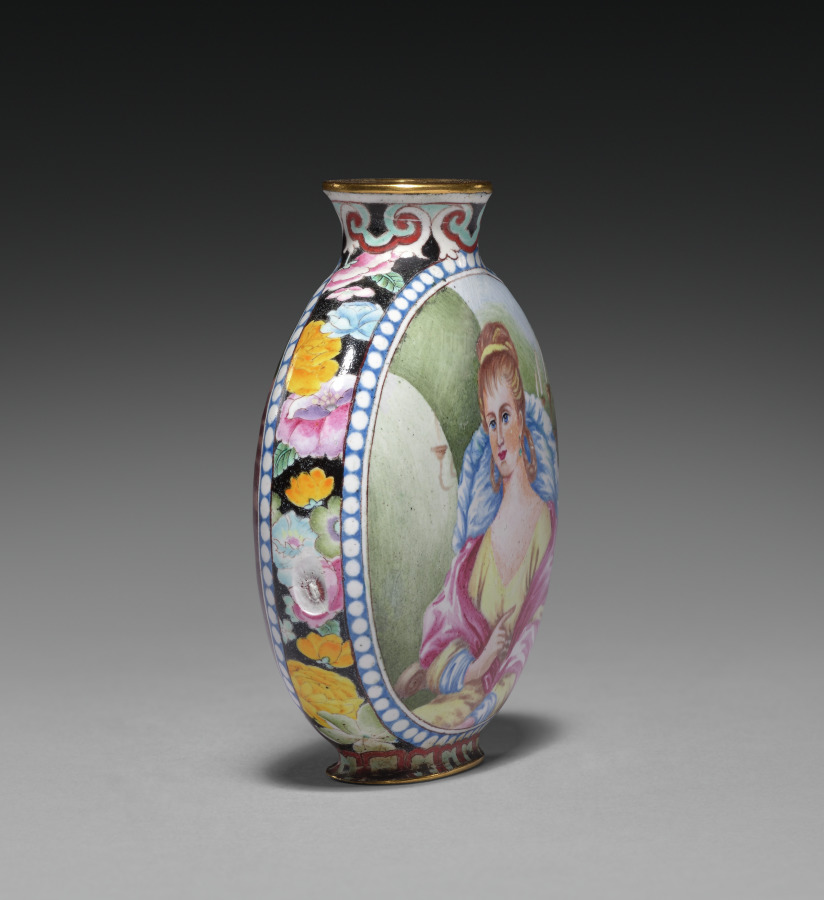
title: Snuff Bottle with European Figures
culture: China, Qing dynasty (1644-1911), Qianlong mark and reign (1736-95)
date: 1736–95 or later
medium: painted enamel on copper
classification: Enamel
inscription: 乾隆年製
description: Snuff bottles were introduced from Europe to China around the 1700s to hold portable snuff or medicine.